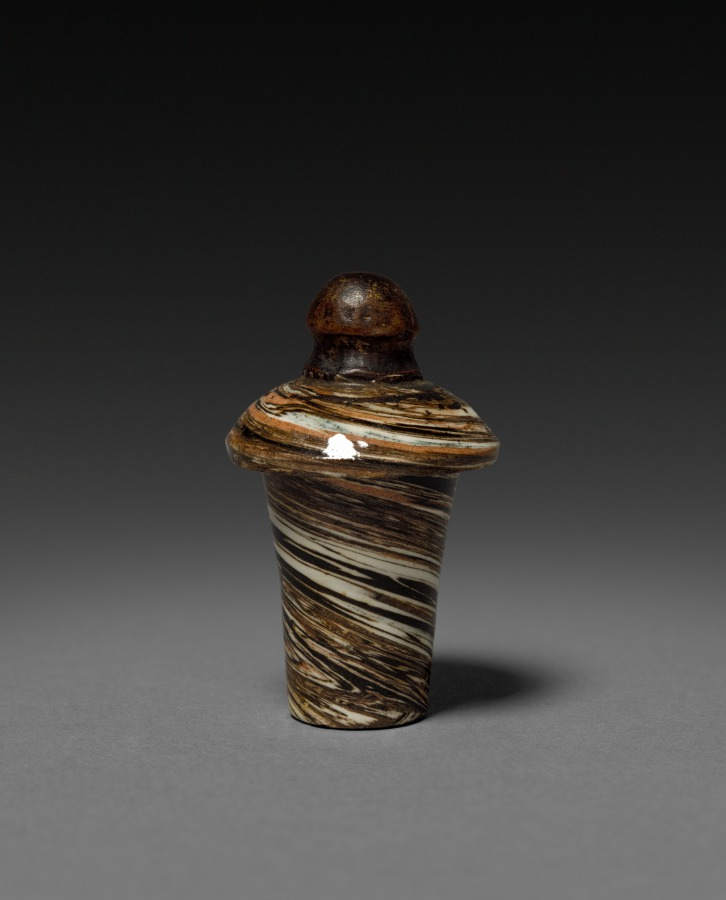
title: Urn (lid)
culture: England, late 18th or 19th century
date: late 1700s - 1800s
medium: earthenware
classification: Ceramic